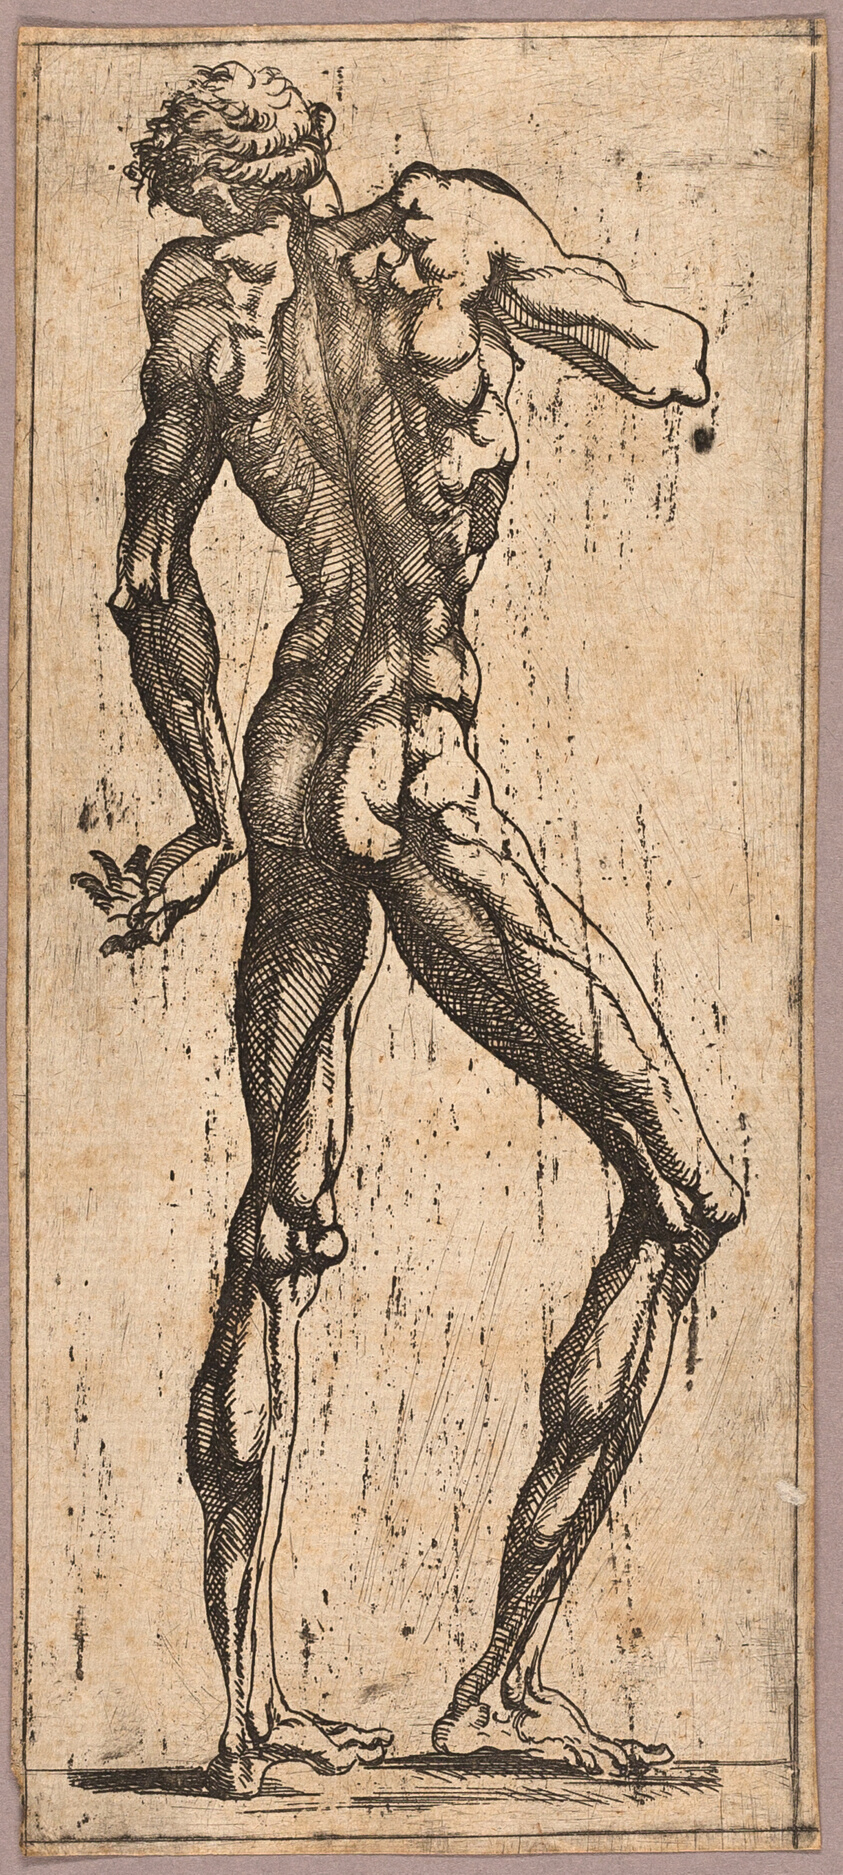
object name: Print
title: Man Turning His Head to the Left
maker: Juste de Juste (French, 1505-1559)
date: c. 1543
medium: Etching in black on cream laid paper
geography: France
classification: etching; paper; print; prints and drawing